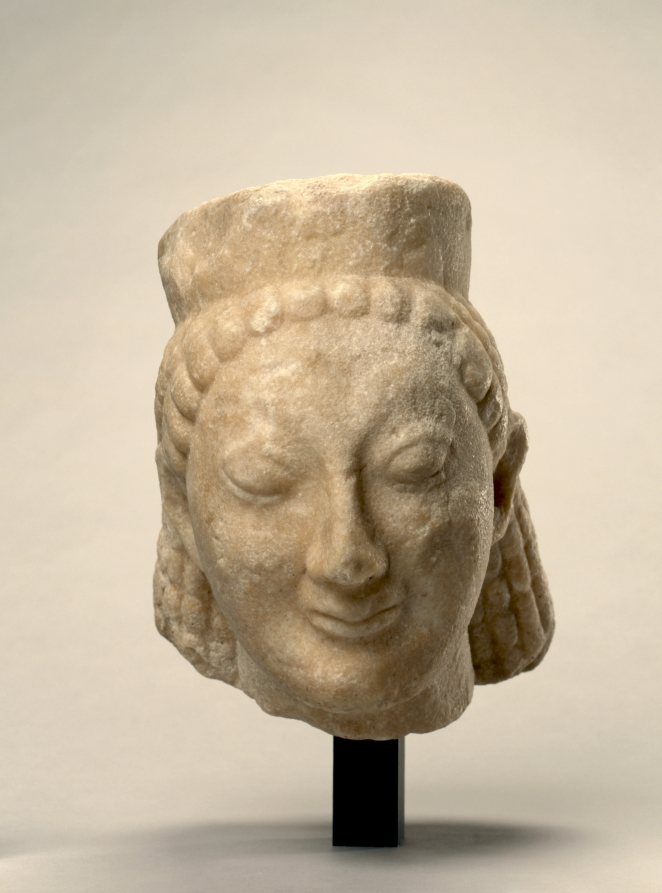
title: Head of a Sphinx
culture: Greece, Archaic period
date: 540–520 BCE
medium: marble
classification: Sculpture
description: This female head once belonged to a sphinx, a mythological hybrid creature with the head of a woman and body of a winged lion. Her short cylindrical crown, known as a polos, helps to identify her as a sphinx, as does the slope of her hair and neck, which once continued onto a feline body. Also common in ancient Egyptian and Near Eastern art (though more often in male form), the sphinx is best known in Greek mythology for devouring passersby who could not answer her riddle outside the Boiotian city of Thebes. Stone sphinxes like this one served as both votive offerings and grave monuments in Archaic Greece.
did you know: Greek sphinxes were often placed on top of columns or grave stelai as guardian figures.